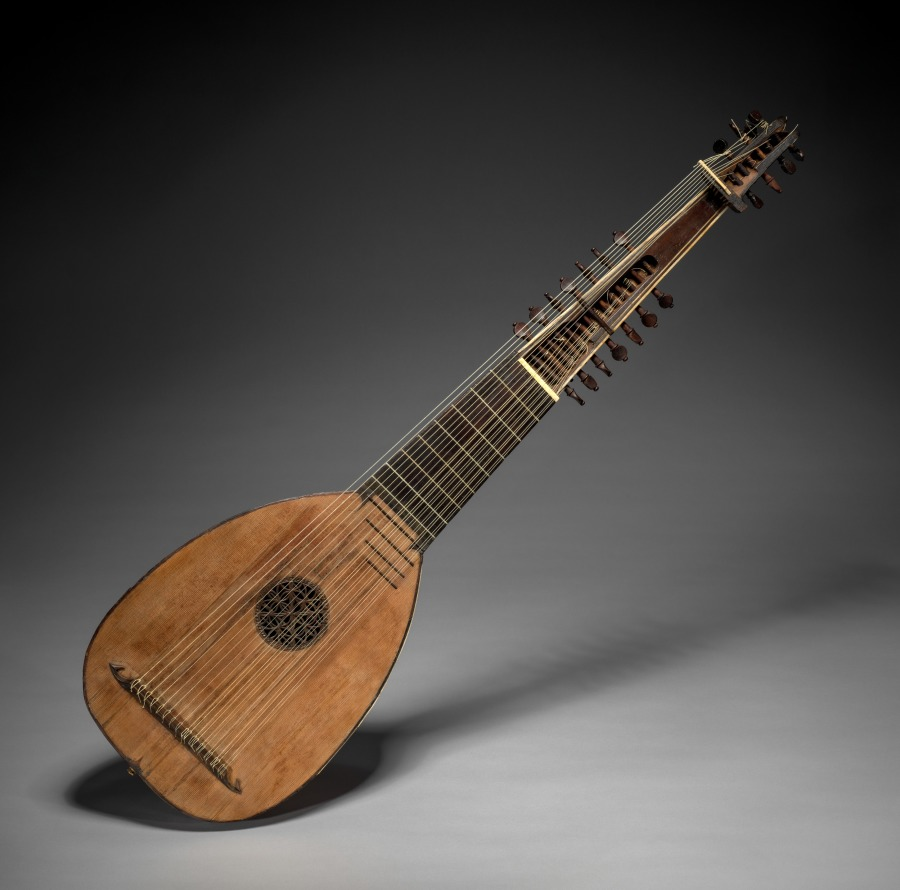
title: Lute or Tiorbino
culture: Italy, probably made in the mid-17th century, but modified by later repair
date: c. 1620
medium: wood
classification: Musical Instrument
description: The lute was the most important musical instrument in secular settings throughout the 16th and 17th centuries. Not only a virtuoso instrument with a huge repertoire, the lute provided the ideal accompaniment for the voice, played an essential role in ensembles, figured in masques and operas, and was played by amateurs as well as professionals. A highly specialized instrument, this tiorbino is a type of long-necked lute resembling a theorbo, but significantly smaller and pitched an octave higher. An object of great rarity, it is one of the smallest Baroque tiorbinos to survive.